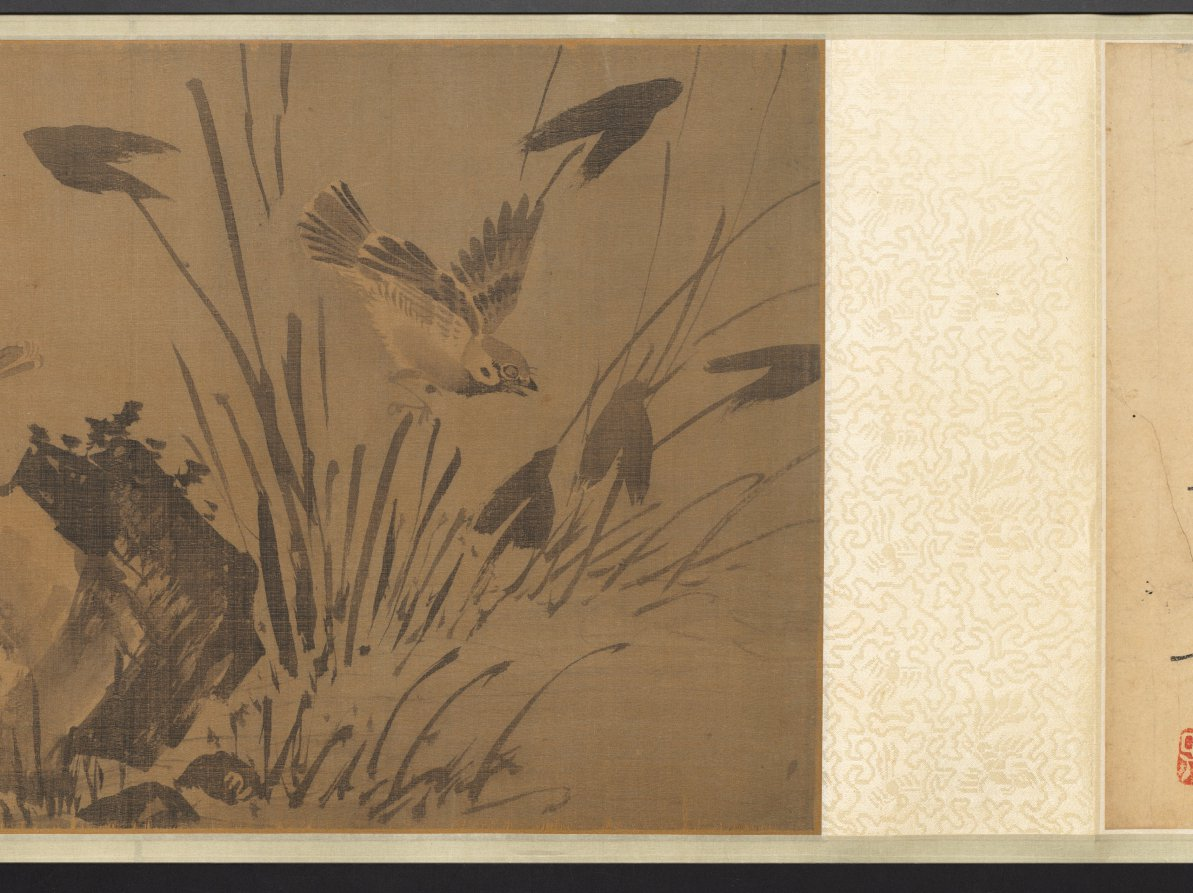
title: A Hundred Sparrows in a Lofty Grove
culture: China, Ming dynasty (1368–1644)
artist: attributed to Lin Liang (Chinese, 1416–1480)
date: 1368–1644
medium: handscroll; ink on silk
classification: Painting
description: Sparrows engaged in all kinds of activities frolic amid leafy branches, blades of grass, rocks, and a waterfall. As our eyes move over the scroll, the artist engages us in enjoying the sparrows’ carefree movements in a natural setting. The charming birds were painted from close observation in swift and fluent brushstrokes. Sparrows are a common bird and in Chinese painting they often represent the commoner in human society as opposed to the noble pheasant or peacock representative of the ruling class.